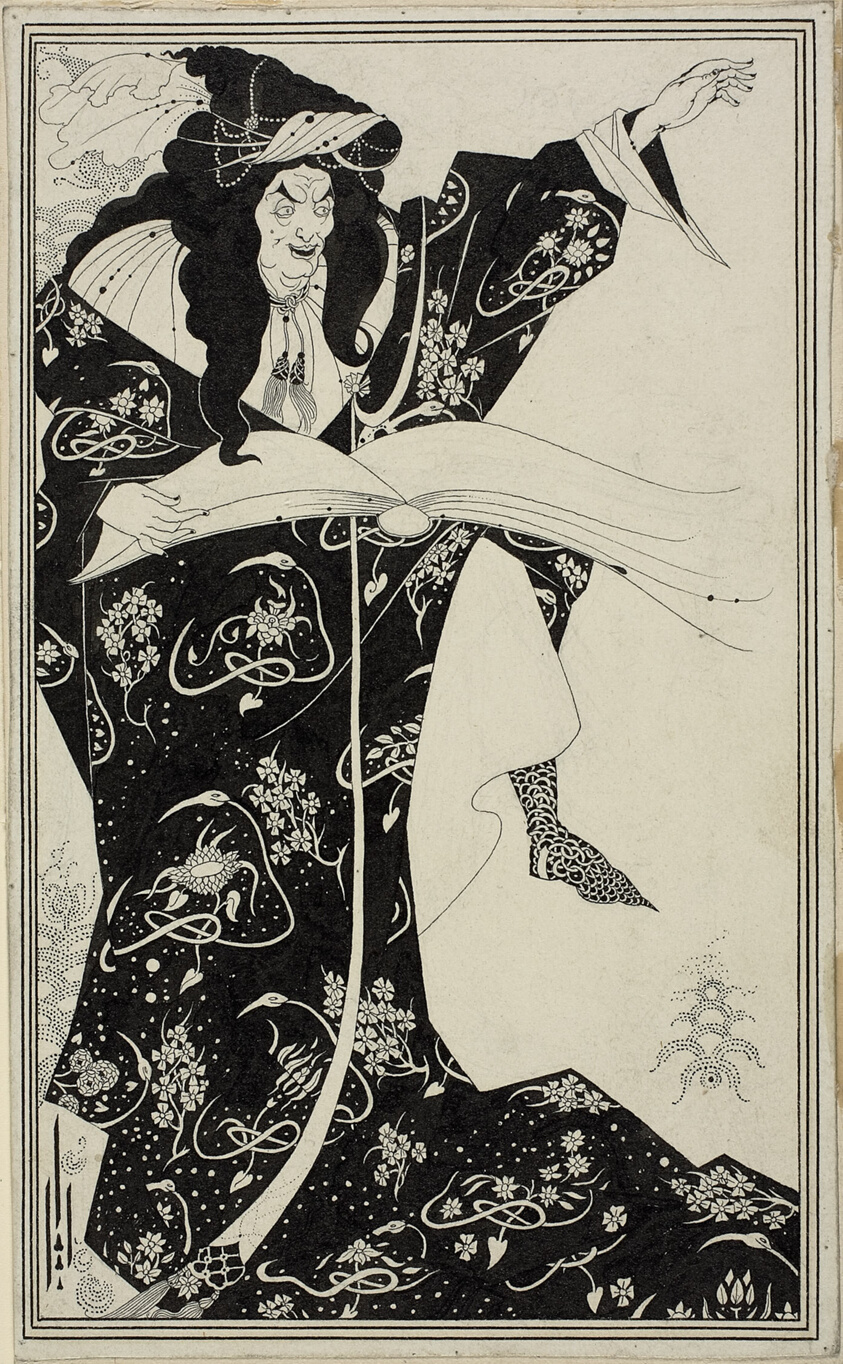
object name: Drawing and Watercolor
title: Virgilius the Sorcerer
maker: Aubrey Vincent Beardsley (English, 1872-1898)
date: c. 1893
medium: Pen and brush and black ink, over traces of graphite, on ivory wove paper, laid down on board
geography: England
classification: pen and ink drawings; drawings (visual works); prints and drawing